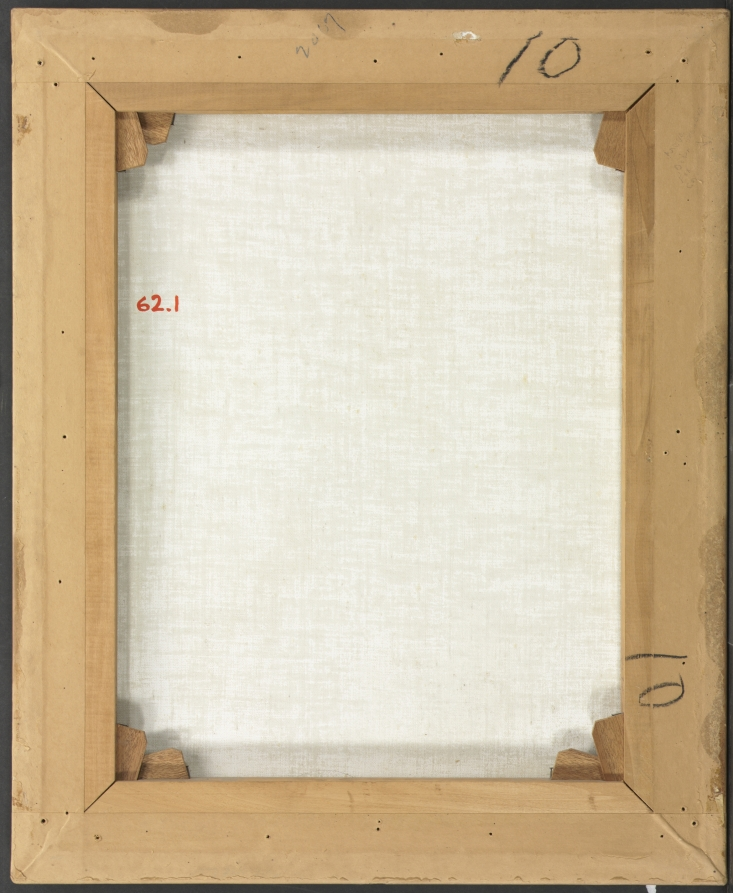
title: Portrait of Vincenzo Guarignoni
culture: Italy, Bergamo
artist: Giovanni Battista Moroni (Italian, 1525–1578)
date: c. 1572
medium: oil on canvas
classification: Painting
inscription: Inscribed at bottom: "VINCENT. GVARINON. AN. AET. XXXXV / MDLXXII"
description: The Latin inscription gives the sitter's name and age (45), as well as the painting's date. Guarignoni came from a prominent family in the northern Italian city of Bergamo. His direct and thoughtful gaze enhances the painting’s lifelike quality, while the solemn detachment conveys dignity and excellence rather than an exact personality, a common approach in Renaissance portraiture.